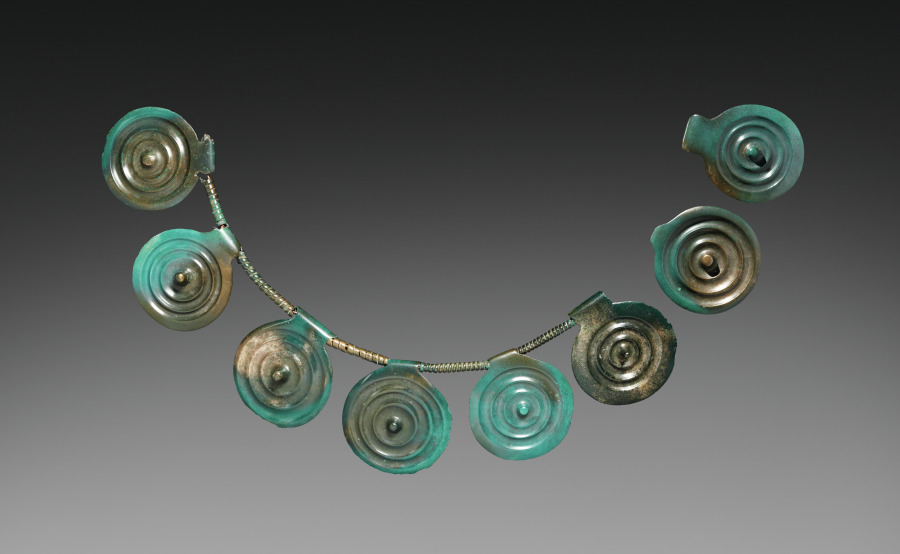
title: Necklace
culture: possibly Hungary, Bronze Age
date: c. 1400–1300 BCE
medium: bronze, cast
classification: Jewelry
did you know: The cast bronze necklace pendants are partially oxidized, revealing a green patina.